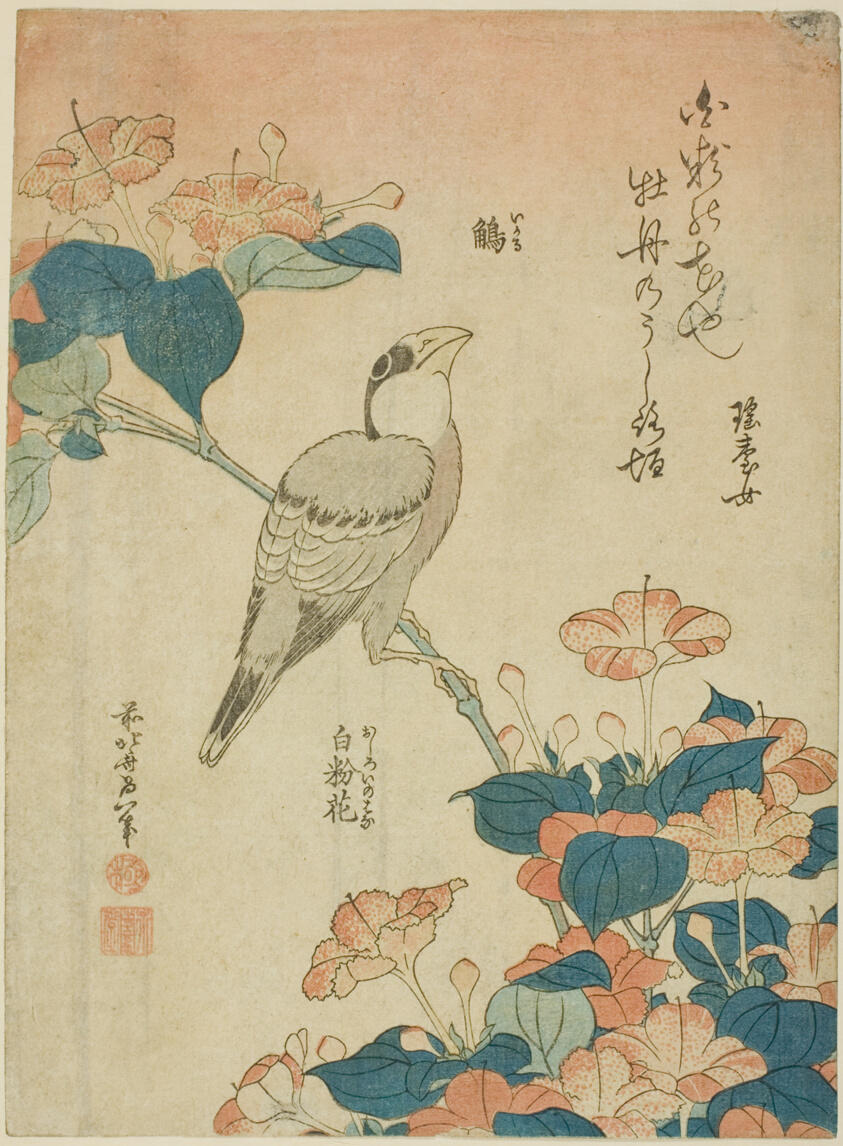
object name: Print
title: Japanese Grosbeak and Marvel of Peru (Ikaru, oshiroi no hana), from an untitled series of flowers and birds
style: Japanese (culture or style)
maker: Katsushika Hokusai 葛飾 北斎; Japanese, 1760-1849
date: c. 1834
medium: Color woodblock print; chuban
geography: Japan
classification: print; asian art